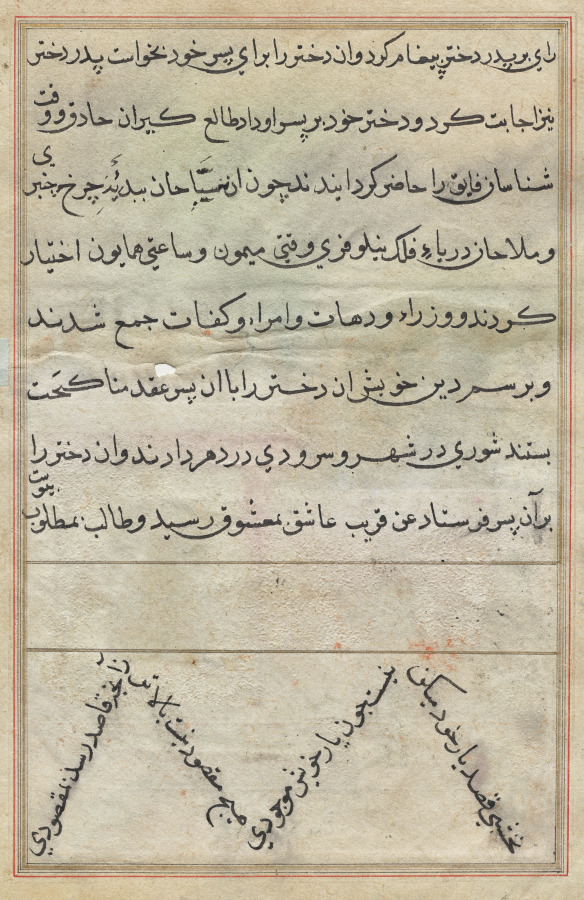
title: Page from Tales of a Parrot (Tuti-nama): text page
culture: Mughal India, court of Akbar (reigned 1556–1605)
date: c. 1560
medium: gum tempera, ink, and gold on paper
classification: Painting